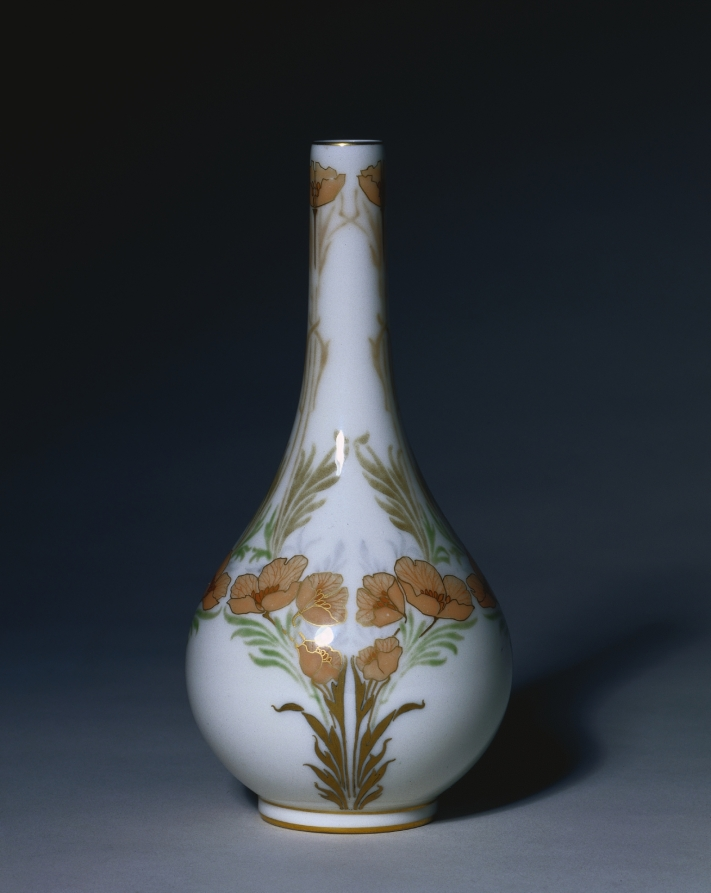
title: Vase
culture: France, Sèvres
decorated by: Jean-Charles-Hippolyte-Abel Leger (French)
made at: Sèvres Porcelain Factory (French, est. 1756)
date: 1905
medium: porcelain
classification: Ceramic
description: The shape of this vase, with its globular body and long neck, is influenced by the form of Chinese porcelain vases intended to hold singular flowers or branches. Delicate pink poppies with green and gold leaves decorate the vase.